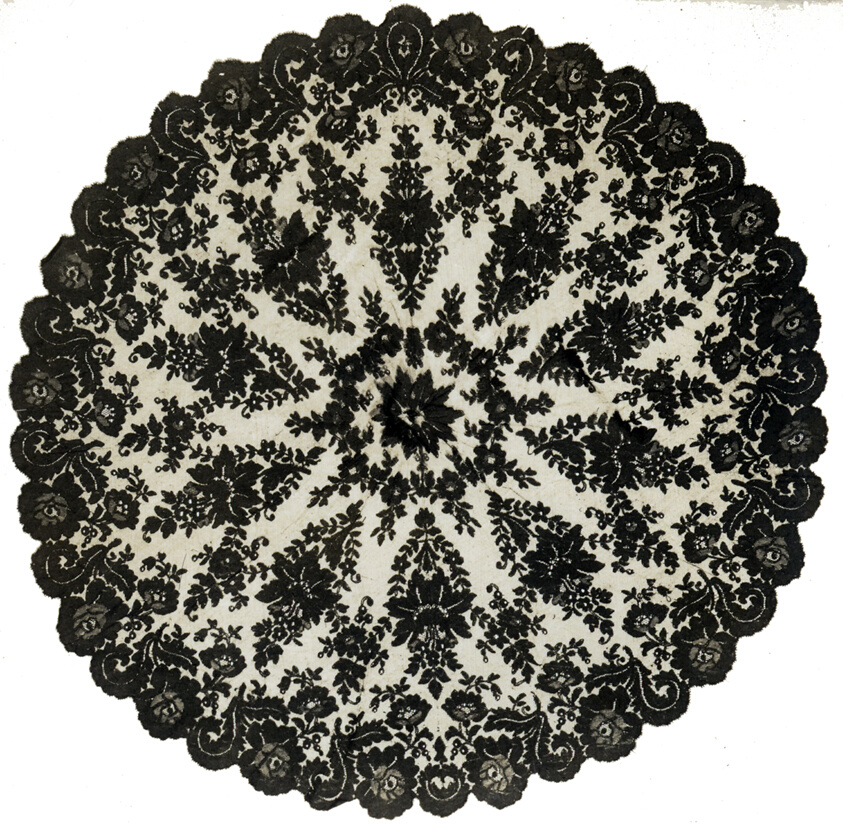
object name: Textile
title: Parasol Cover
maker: France or England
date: 1870s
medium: Silk, Pusher machine lace imitation of "Blonde Matte" bobbin lace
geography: France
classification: textile; lace - machine; lace